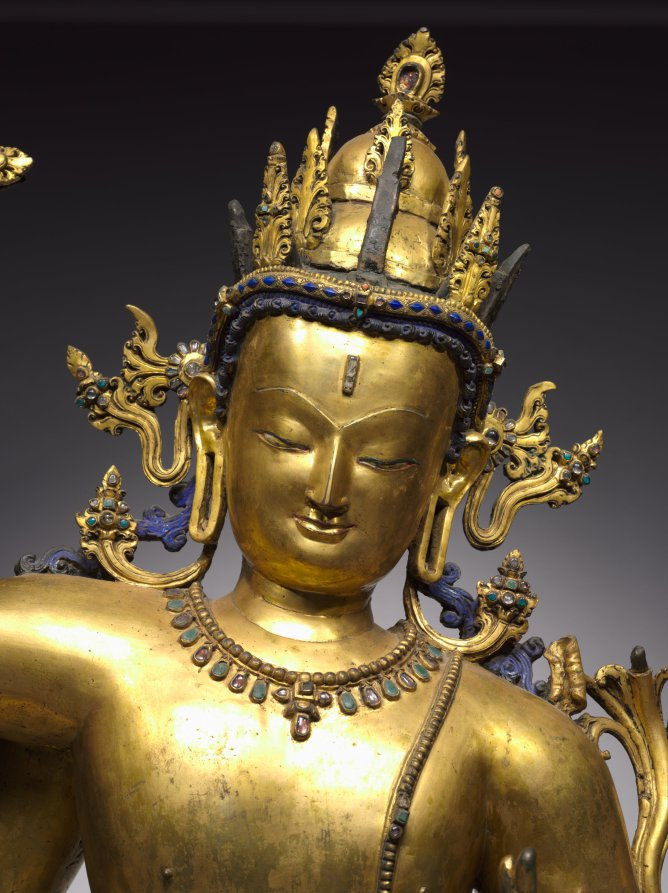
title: Bodhisattva of Wisdom (Manjushri)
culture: Nepal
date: 1400s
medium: Gilt bronze with precious and semiprecious stones, gum tempera, and cold gold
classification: Sculpture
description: This image depicts one of the main bodhisattvas, beings only one stage away from full enlightenment. Because the historical Buddha was a prince prior to his renunciation and life as a wandering ascetic, bodhisattvas are depicted as royal princes. This example has the sharp features, sweet expression, and crisp details characteristic of images made in Nepal during the 1400s. In his upraised right hand Manjushri holds the hilt of a sword that, like wisdom itself, metaphorically cuts through and defeats ignorance. His lower, rear left hand grasps a bow, once probably strung with a wire. Also missing is the arrow that he likely held in his lowered right hand. Arrows were often symbols for mantras, or strings of syllables thought to have the power to focus the mind and work like missiles to destroy negativity and affliction. The gesture of his lowered left hand indicates the transmission of Buddhist teachings. The lotus stem that rises at the left elbows originally held a book of sutras. This figure is in the yogic posture of meditation with the big toe flexed in concentration. Yoga is of central importance in tantric Buddhism, because high-level practitioners are able to discipline the body to such an extent that the mind can also be controlled.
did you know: The bodhisattva's short breeches are patterned in spiraling floral forms incised into the metal.